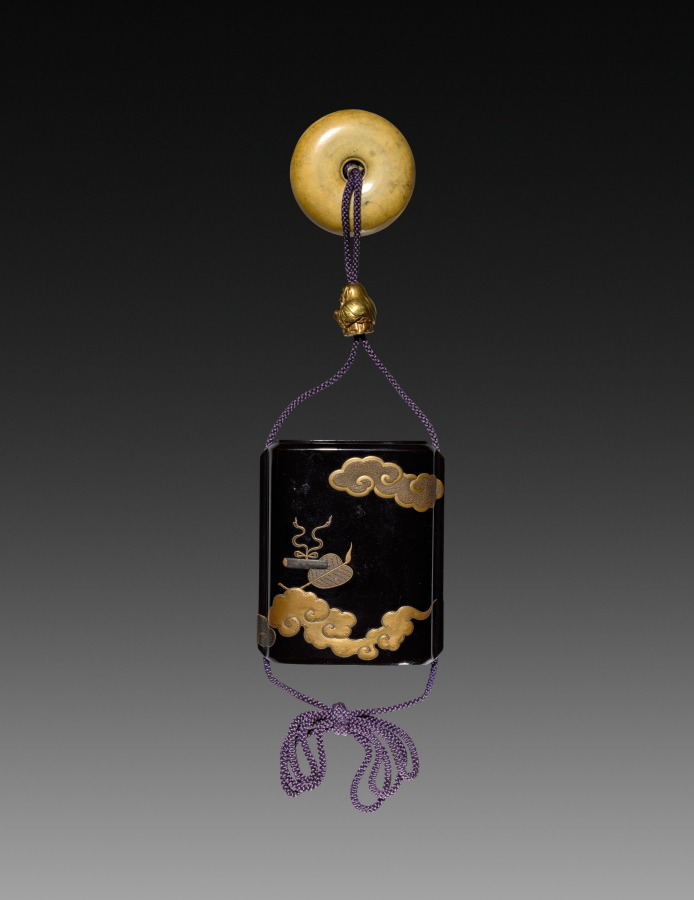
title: Inro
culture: Japan, Edo period (1615–1868)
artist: Ikeda Taishin (Japanese, 1829–1903)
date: mid-1800s to early 1900s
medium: lacquer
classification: Lacquer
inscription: Signature: Taishin